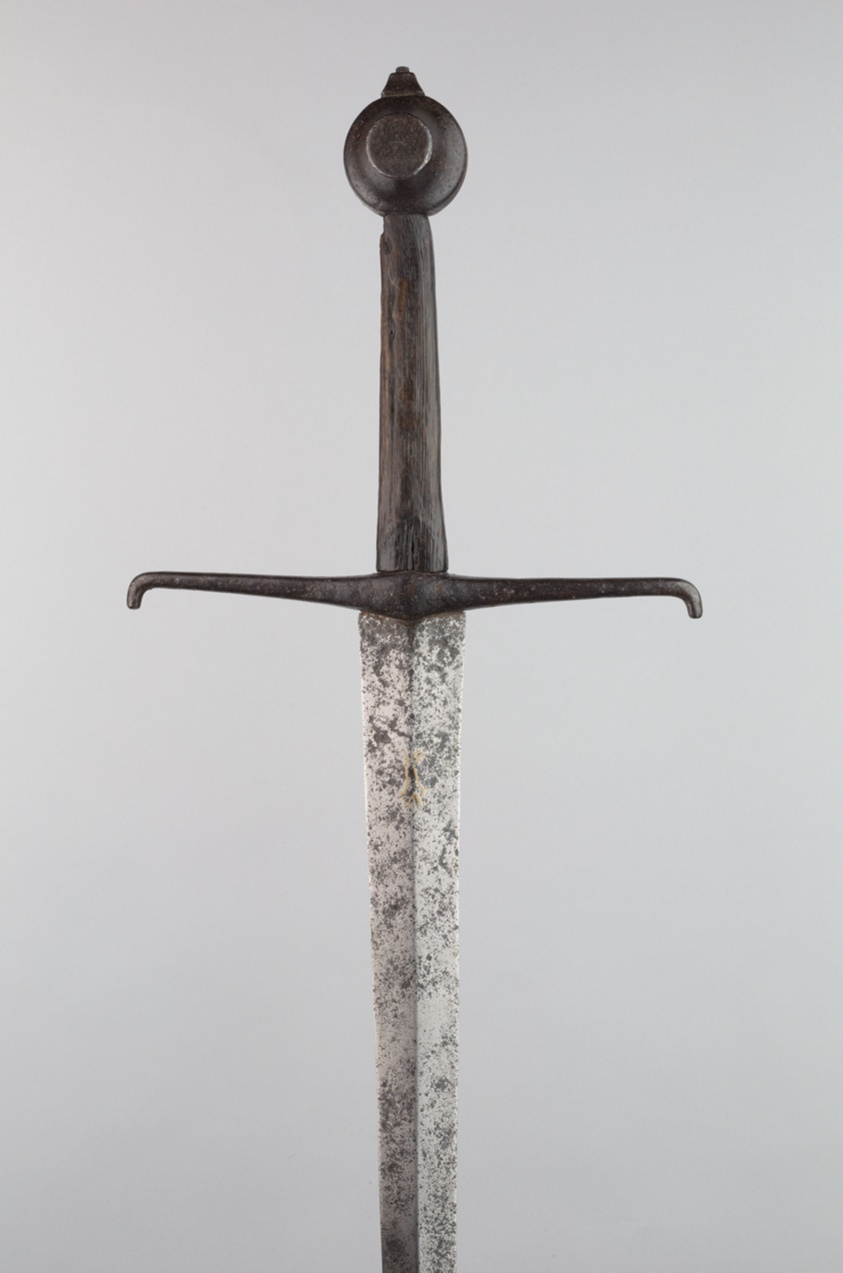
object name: Arms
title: Thrusting Sword (Estoc)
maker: Western European, probably Solingen or Passau, Germany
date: 1390/1400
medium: Steel, iron, brass, and oak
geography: Germany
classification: edged weapon-sword; arms; arms and armor